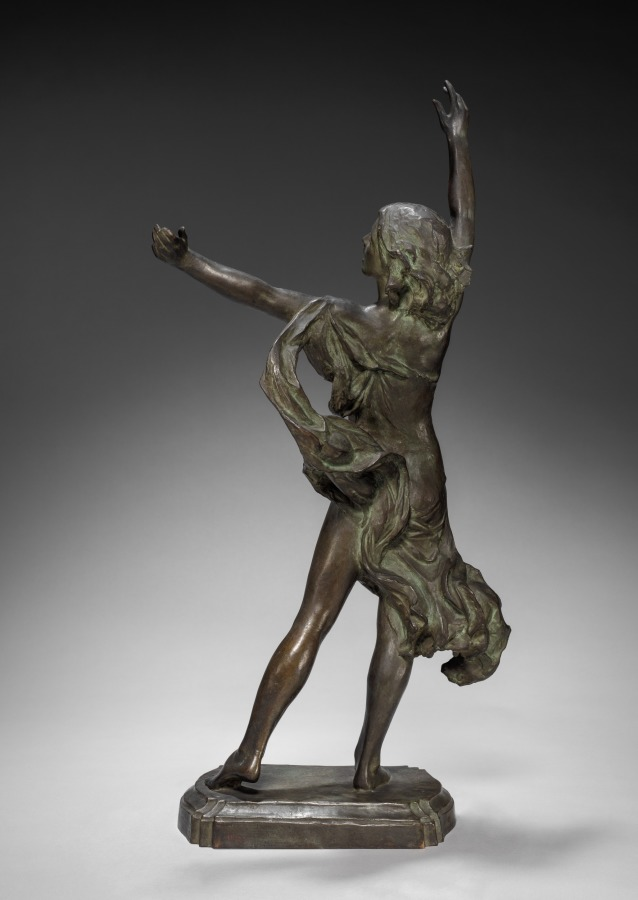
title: Pippa Passes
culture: America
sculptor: Louise Allen (American, 1880–1953)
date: c. 1916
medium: bronze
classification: Sculpture